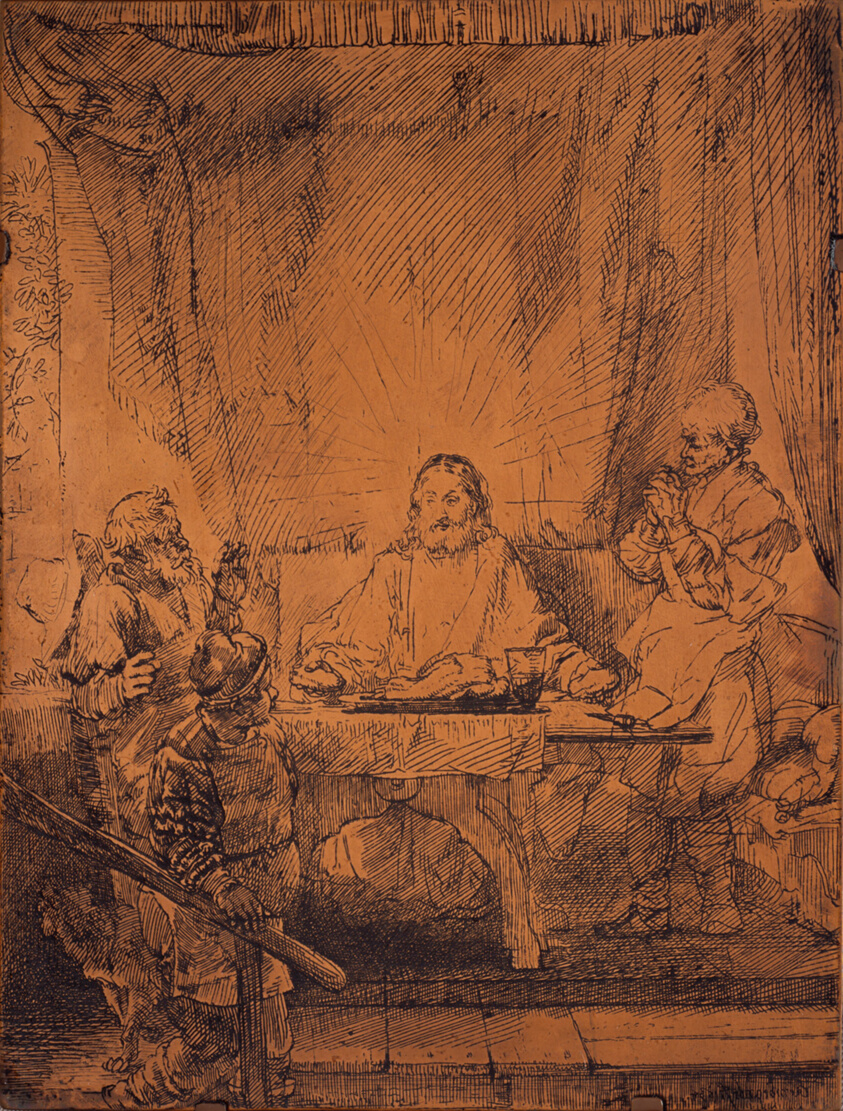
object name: Print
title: Supper at Emmaus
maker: Rembrandt van Rijn (Dutch, 1606-1669)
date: 1654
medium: Copper etching plate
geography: Holland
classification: etched plate; matrix; prints and drawing; print